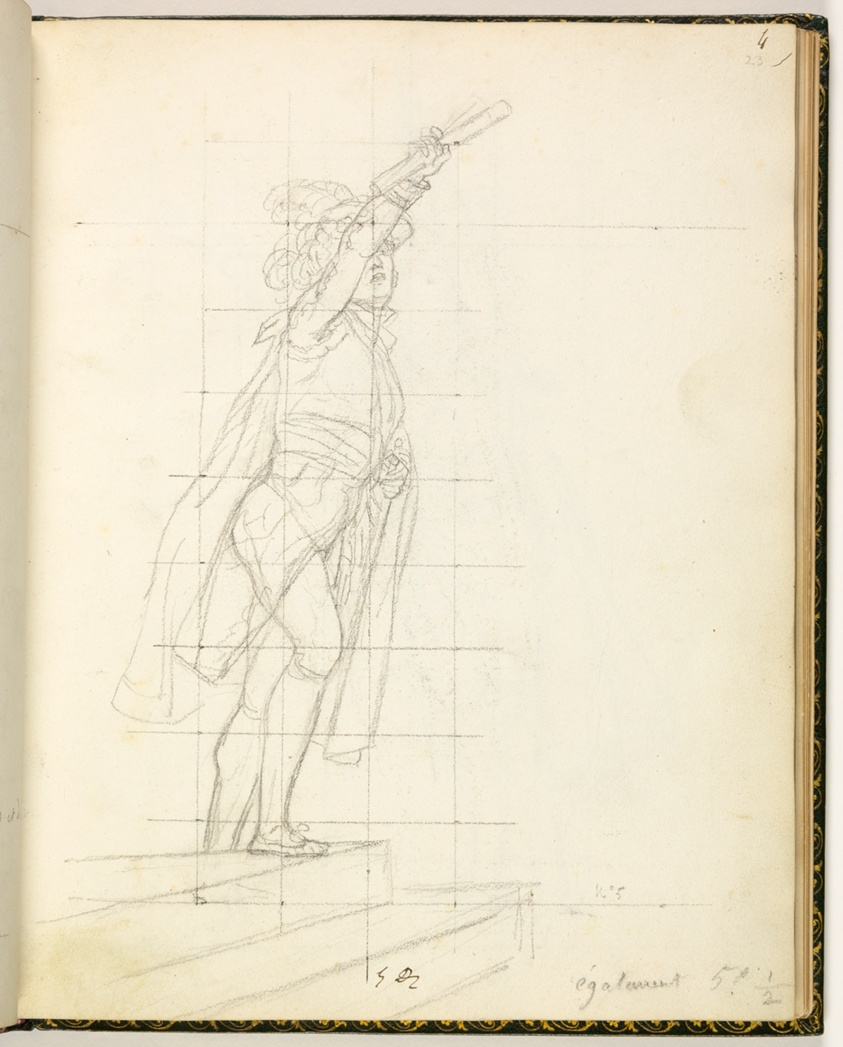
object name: Drawing and Watercolor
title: Sketchbook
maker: Jacques-Louis David; French, 1748-1825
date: 1809–10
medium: Graphite, black chalk, black crayon, and pen and brown ink drawings on wove paper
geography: France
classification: sketchbook; chalk; prints and drawing; paper